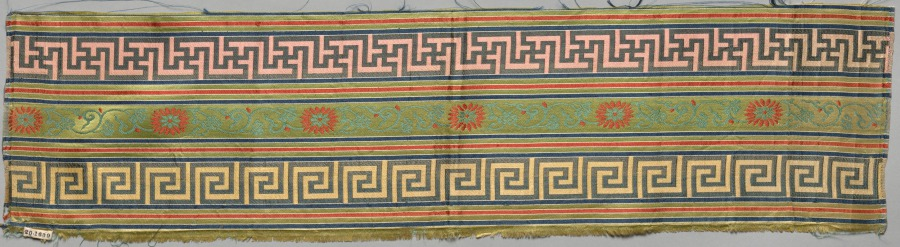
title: Border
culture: China, 19th century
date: 1800s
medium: silk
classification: Textile